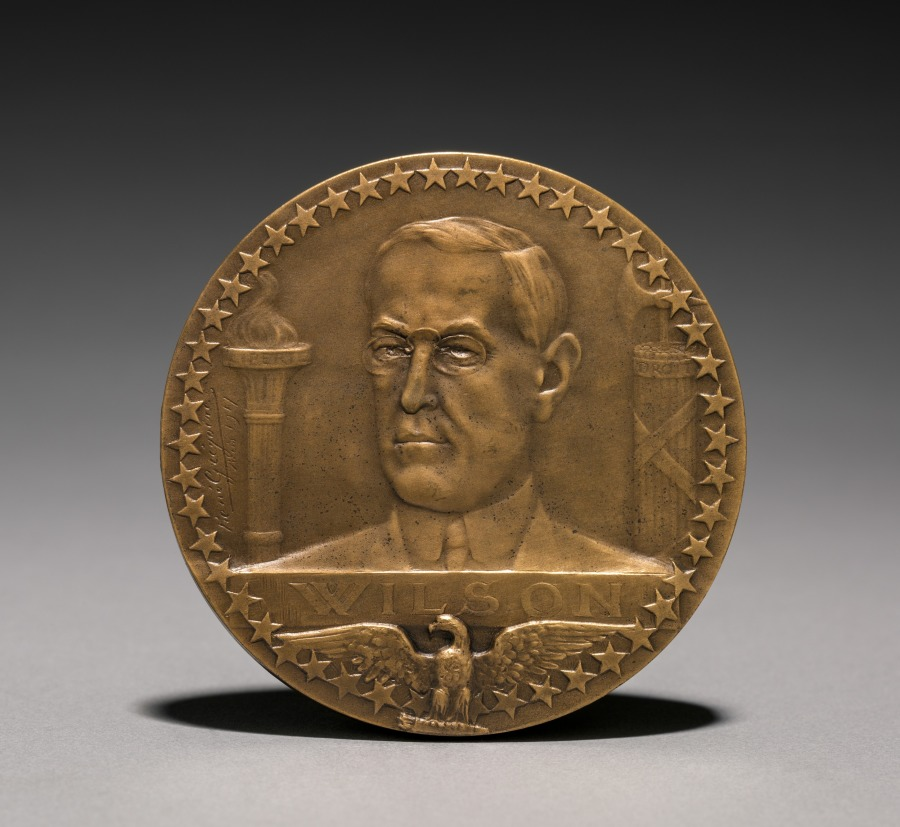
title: Medal (reverse)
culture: France, early 20th century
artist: René Grégoire (French, 1871–1945)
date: 1914–1918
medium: bronze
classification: Metalwork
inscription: "Le droit est plus précieux que la paix . . . Nous, nous battons pour la liberté."